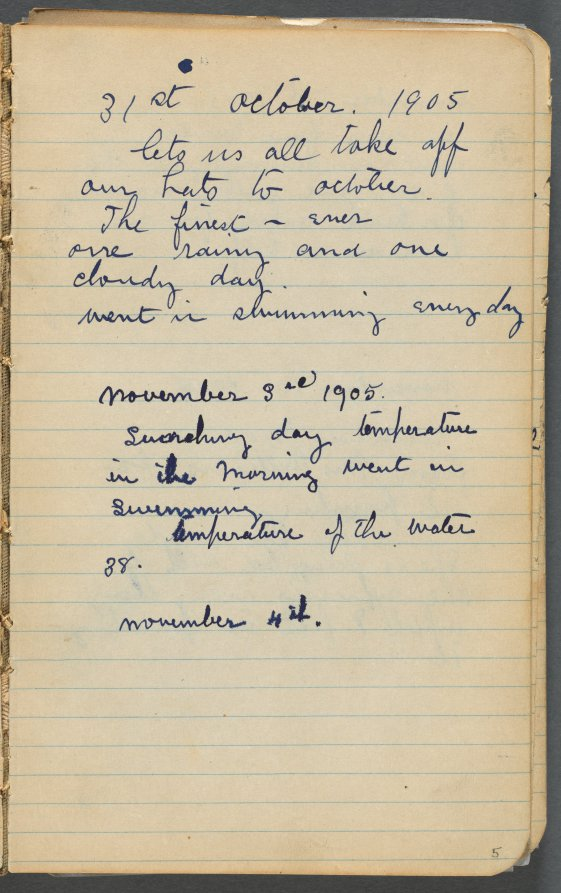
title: Sketchbook, page 005: Notes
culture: America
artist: Maurice Prendergast (American, born Newfoundland [now Canada], 1858–1924)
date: 1905–10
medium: graphite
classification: Bound Volume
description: This sketchbook contains 69 pages of drawings, a diary largely devoted to the state of the artist's health, and a three-page discourse on the nature of genius and ideas.